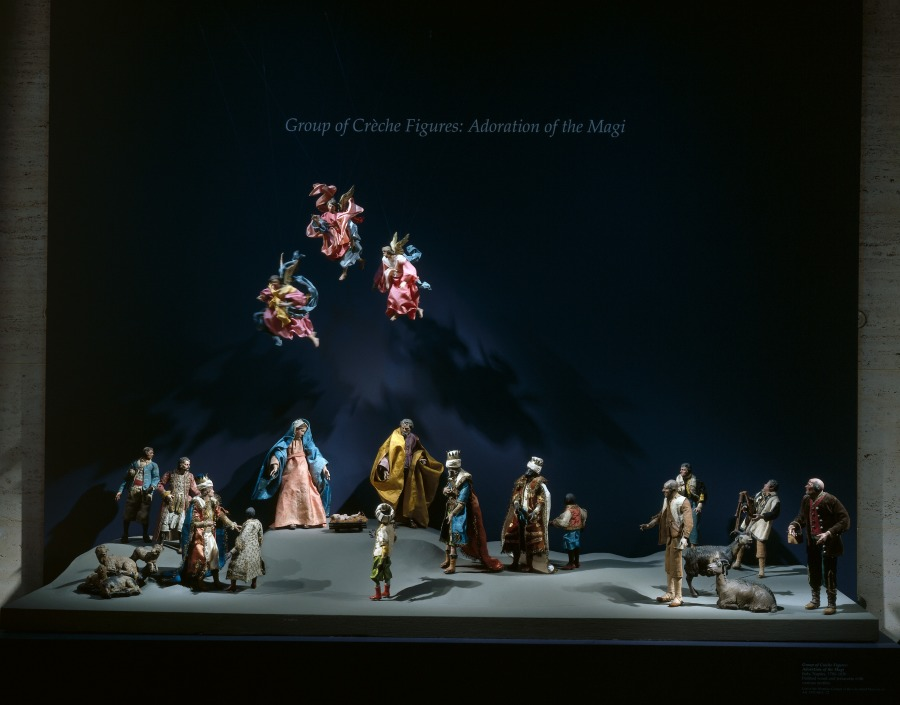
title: Figures from a Crèche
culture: Italy, Naples, late 18th-early 19th century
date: 1780–1830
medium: painted wood and terracotta with various textiles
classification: Sculpture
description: The practice of creating scenes of the Nativity for the home dates from the early 1700s in Italy, where people began to set up doll-like figures of about a foot or less in height. The custom was particularly popular in Naples around 1800, where crèche scenes (crèche means cradle, or crib) included many figures, whose heads and hands of painted terracotta, stuffed cloth bodies, and clothing adapted from contemporary local costumes gave them an amazingly realistic character. Representations of the birth of Jesus can be traced to the first few centuries of Christianity. Both living creatures and sculptural depictions of them were used from early times. By the late middle ages it was customary to create life-size figures of wood or stone, naturalistically painted, to represent the characters who participated in the events of Jesus's early life. These sculptures were then arranged in scenes illustrating one or both of the most important of these events, the Adoration of the Shepherds and the Adoration of the Magi-the three kings from the East who came to pay homage to the Christ child. Used in churches, these large figures were especially popular in Italy, Central Europe, Spain, and Portugal.